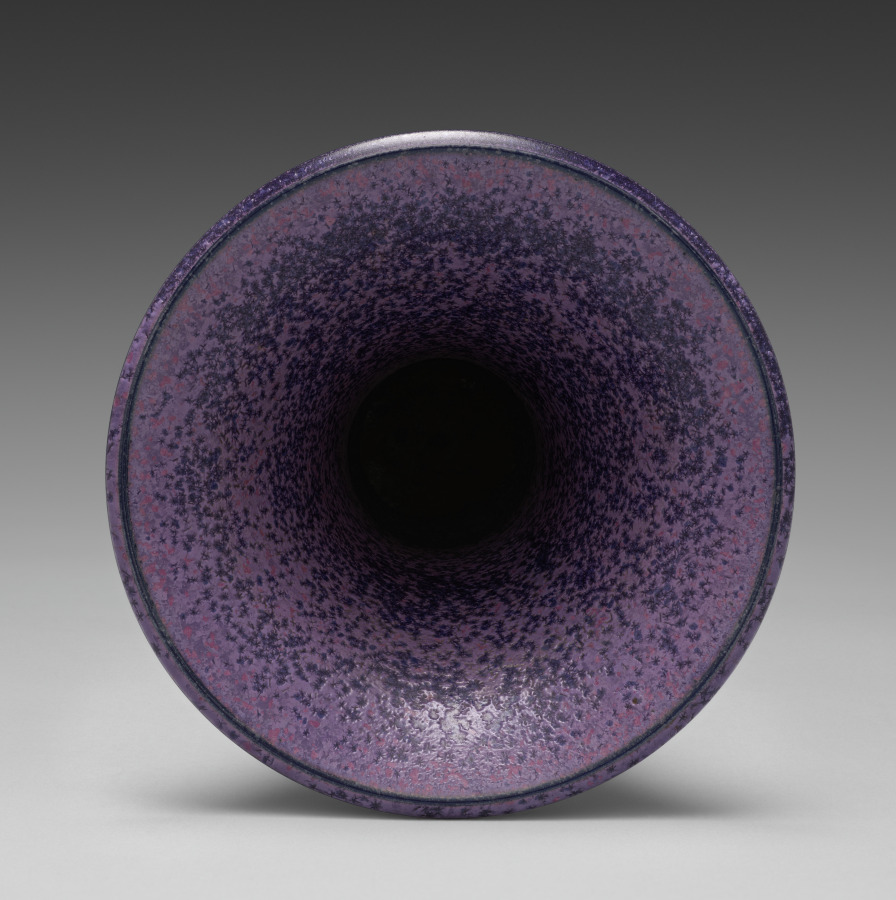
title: Gu-Shaped Vase with Patina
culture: Japan, Taishō period (1912–26) or Shōwa period (1926–89)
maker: Seifū Yohei IV (Japanese, 1872–1951)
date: 1914–46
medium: Porcelain with overglaze color enamel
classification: Ceramic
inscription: 清風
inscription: 成山清風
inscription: 清風造 【印】 清風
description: Yohei IV’s interest in bold, colorful designs is on full display in this purple gu-shaped vase. He not only exhibits his penchant for bold colors but also shows off a complex surface that suggests the patina on an ancient bronze. The body of the vase is a dark, greenish blue over which there is a thick application of color. While the predominant overlaid color is lavender purple, salmon pink and cornflower blue appear in places along with myriad nearly black forms, perhaps floating dandelion seeds or tiny flowers, scattered over the surface.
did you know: The glaze recalls in some respects a Chinese glaze named “snowflake blue,” or xuehualan (Japanese sekka’ai), a low-fired lead-fluxed glaze.